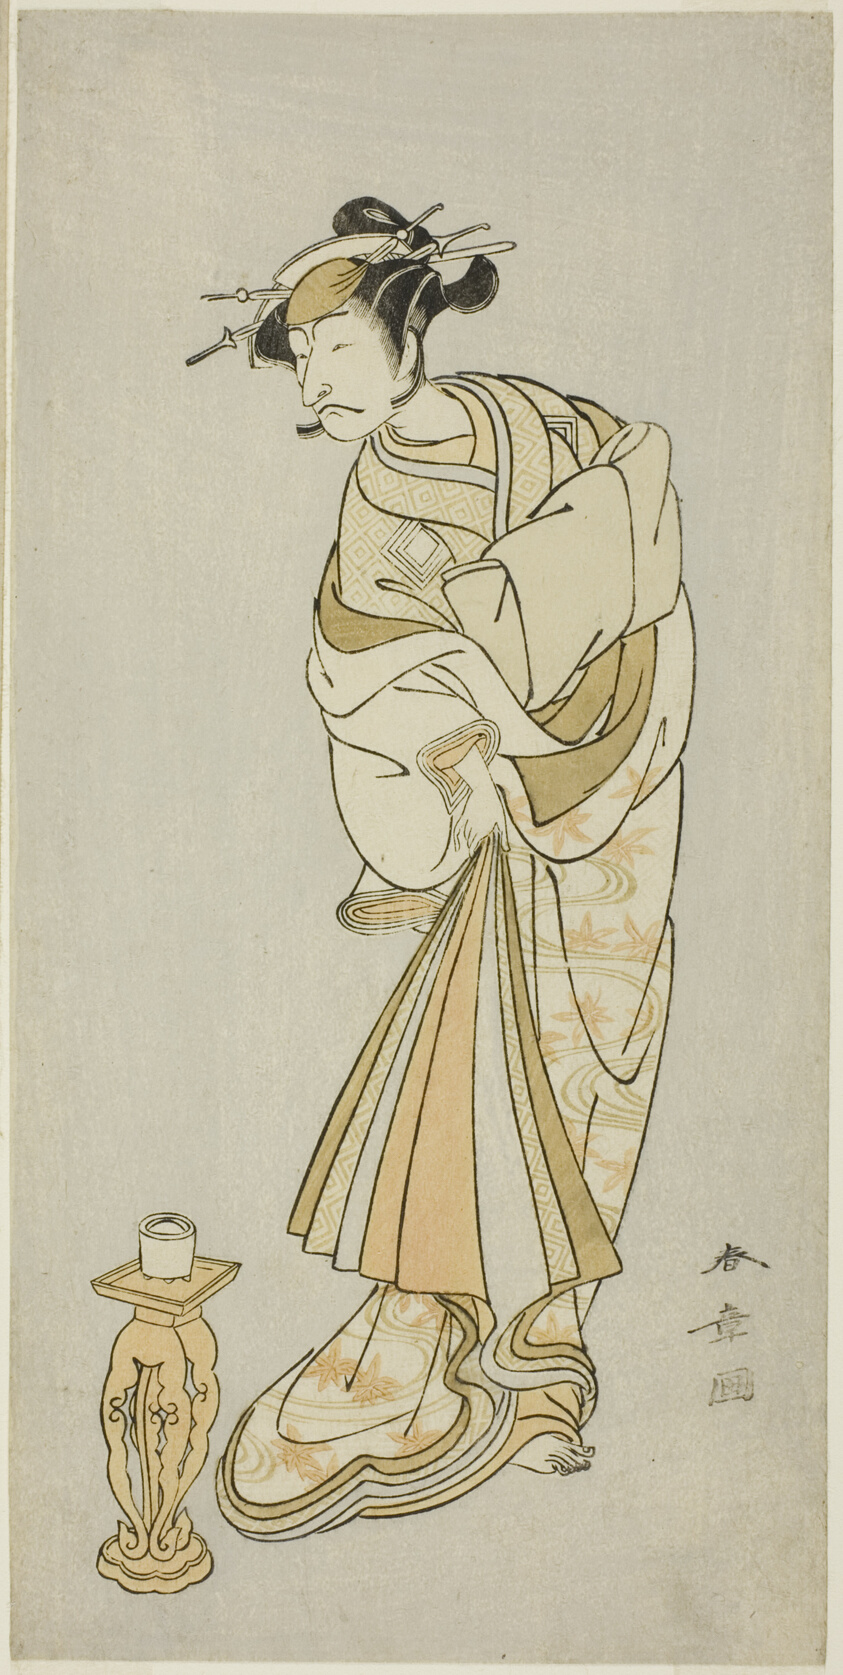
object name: Print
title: Actors Ichikawa Danjûrô V as the Spirit of the Monk Seigen and Nakamura Noshio I as the Spirit of the Courtesan Takao in “Courtesan in a Maple-Leaf-Pattern Over-Kimono” (“Keisei Momiji no Uchikake”)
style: Japanese (culture or style)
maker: Katsukawa Shunshô 勝川 春章; Japanese, 1726-1792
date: About 1772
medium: Color woodblock prints; hosoban diptych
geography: Japan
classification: woodblock print; print; asian art